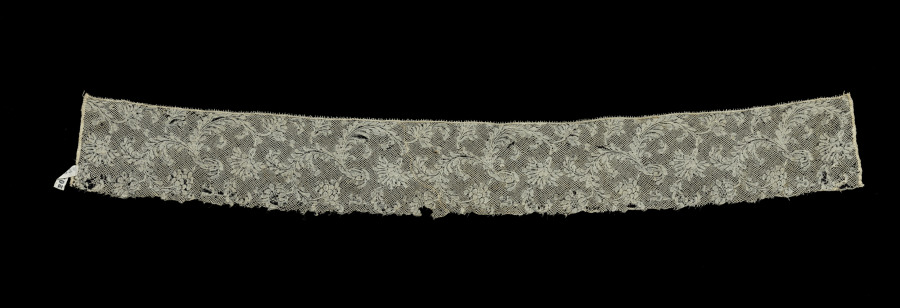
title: Lace Insertion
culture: Belgium, Binche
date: 1700s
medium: Bobbin lace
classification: Lace